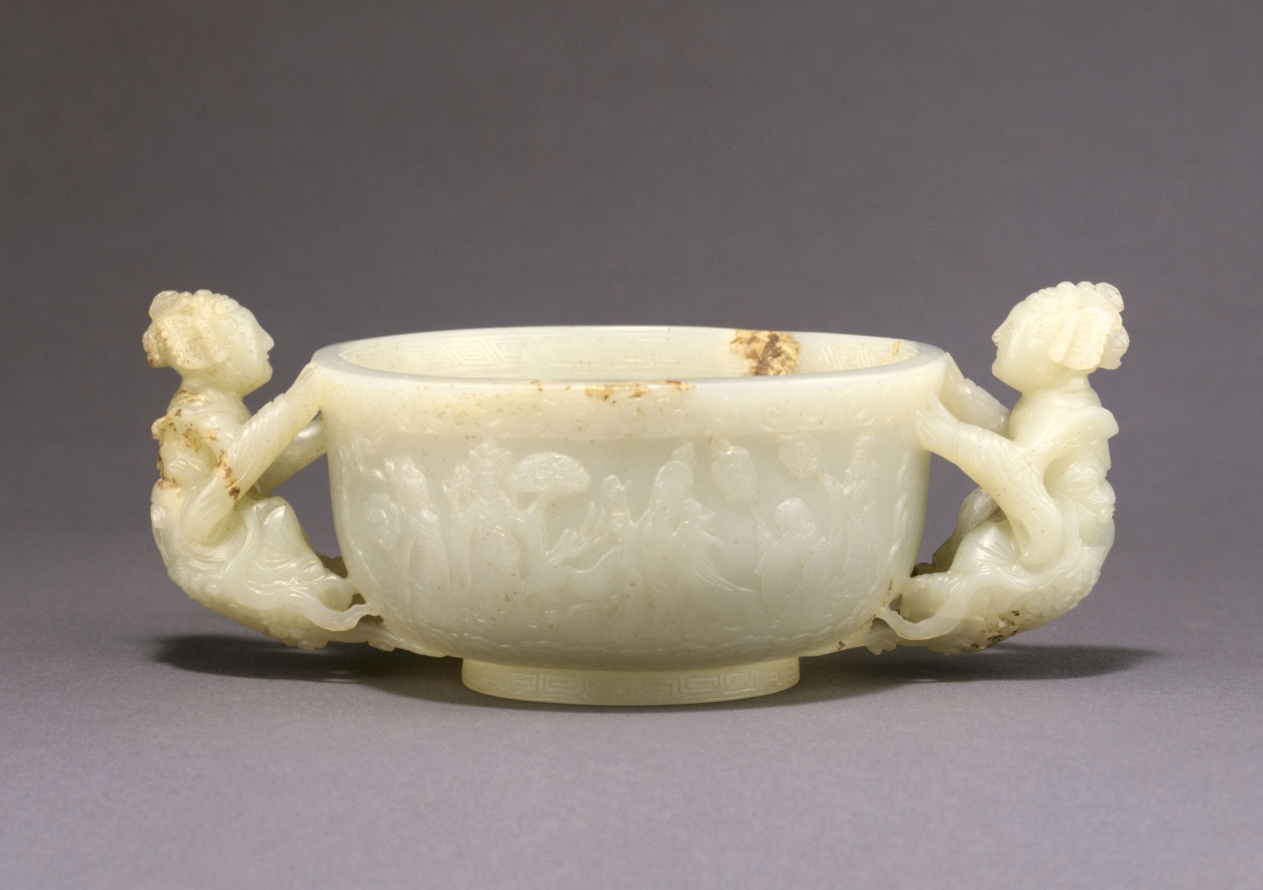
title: Cup with Daoist Figures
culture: China, Qing dynasty (1644–1911), Qianlong period (1736–95)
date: 1736–95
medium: Pale greenish-white jade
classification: Jade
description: During the Qing dynasty, Suzhou’s best products were sent north to the capital. Those that met imperial approval were sometimes graced with Qianlong’s mark, added by calligraphers and jade workers at court. The lack of a Qianlong mark on the Cleveland cup suggests that it might not have reached the court. Previously dated to the Yuan dynasty (1271–1368), new scholarship dates this cup to the Qing period.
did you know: Two female immortals serve as handles, while a Daoist procession with immortals, musicians, and attendants winds around the body of the cup.